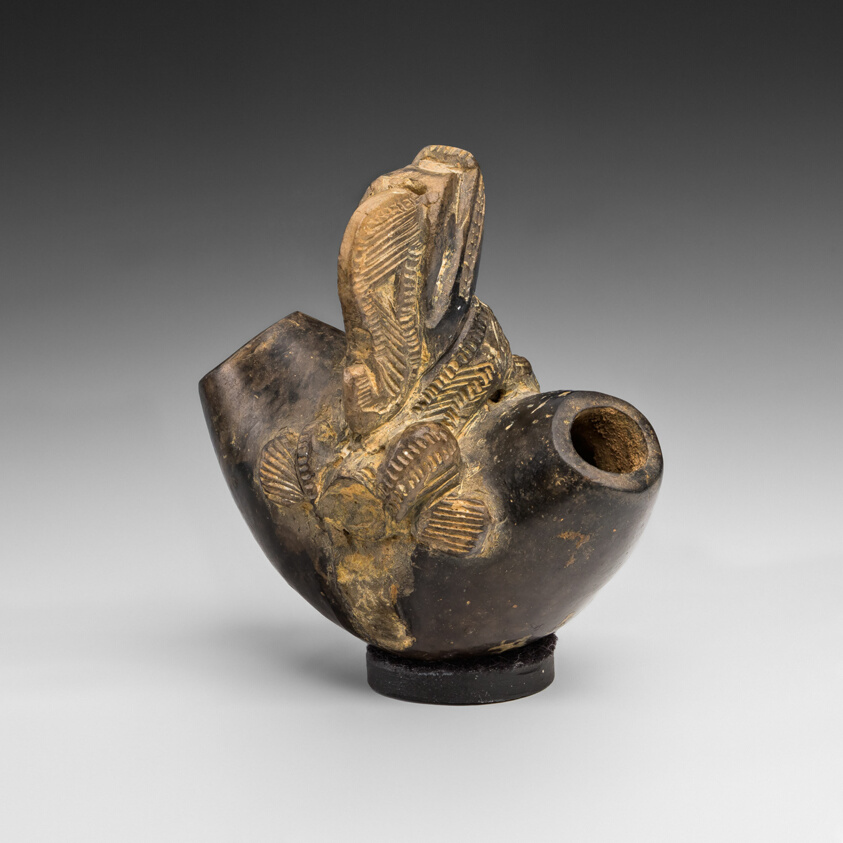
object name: Decorative Arts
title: Whistle with an Iguana or Saurian Sculpted on its Surface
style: tairona, americas, lower central america, Arts of the Americas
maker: Artist unknown (Tairona); Sierra Nevada de Santa Marta, Colombia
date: c. 1300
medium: Ceramic and pigment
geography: Colombia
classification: musical instrument; earthenware; american decorative arts; ceramics; miniature; decorative arts; art of the americas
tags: iguana, musical instruments, saurian